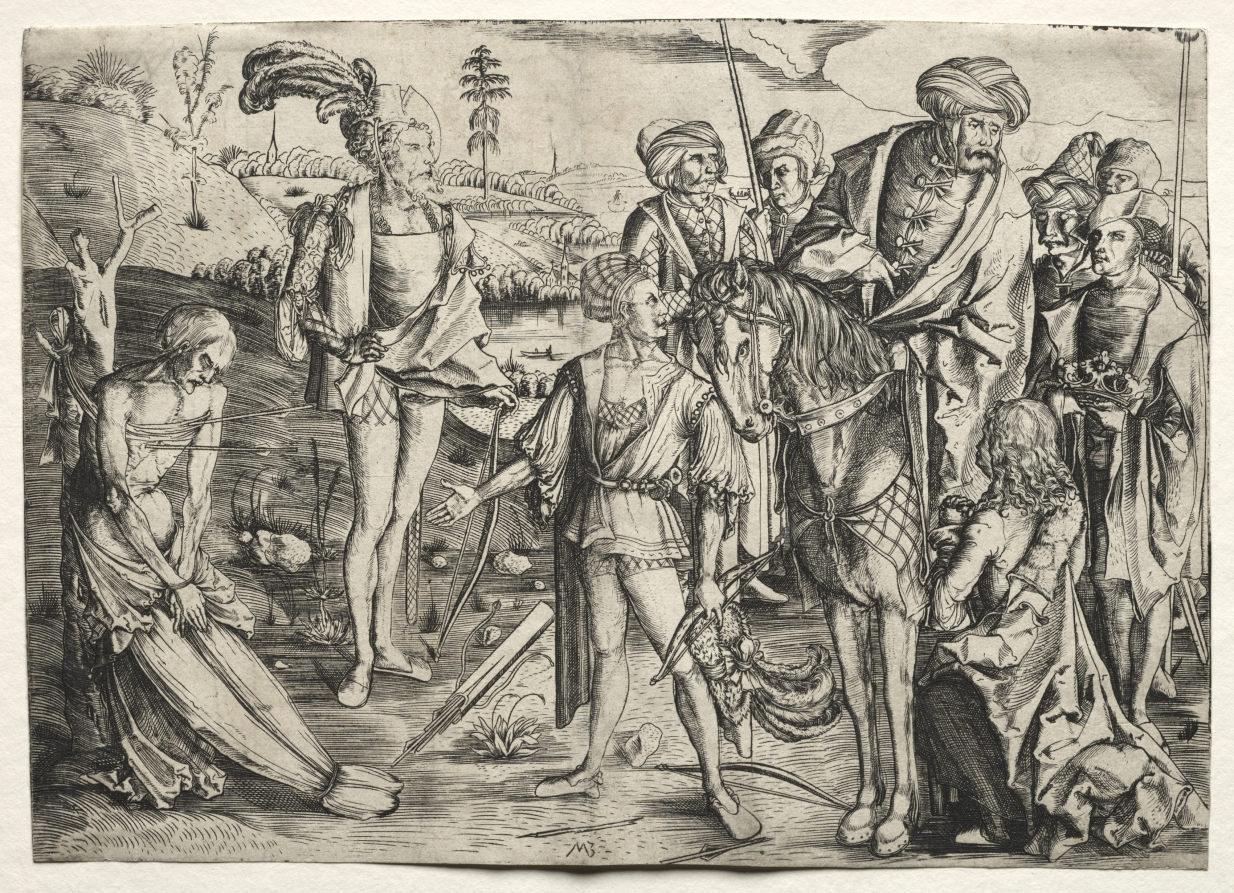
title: The Story of the Dead King and his Three Sons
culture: Germany, early 16th Century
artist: Master MZ (German)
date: 1500–03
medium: engraving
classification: Print